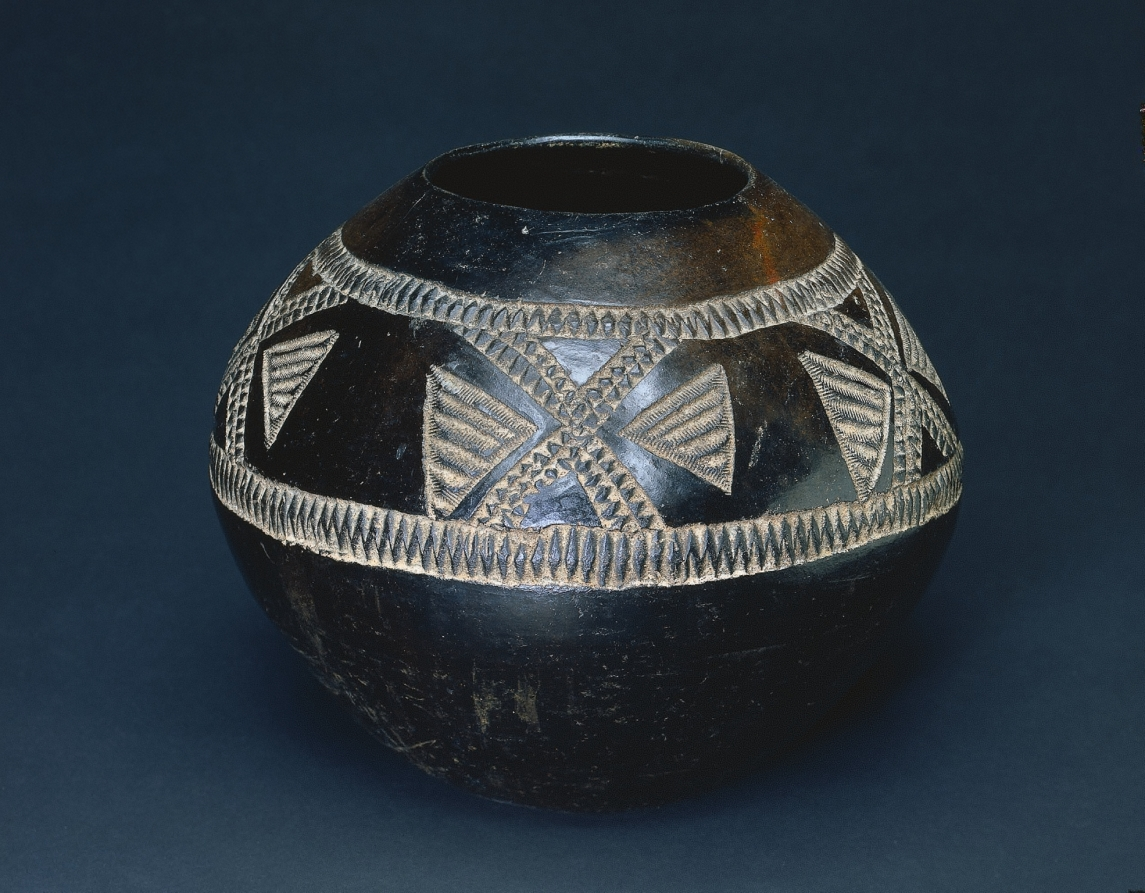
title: Pot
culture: Southern Africa, South Africa, Zulu-style potter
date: 1900s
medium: Terracotta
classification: Vessels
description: Within the Zulu culture (the Northern Nguni tribe), the making of beer pots is the traditional function of women. A potter will travel far searching in riverbeds or for anthills that can supply the correct clay for the vessels. Formed using the coil technique and smoothed using flattened stones, the pots are fired in a dug-out earthen "kiln," and covered with palm leaves, whose oil results in the blackened, shiny texture of the vessels. Years of use deepen this texture to a rich woody patina.